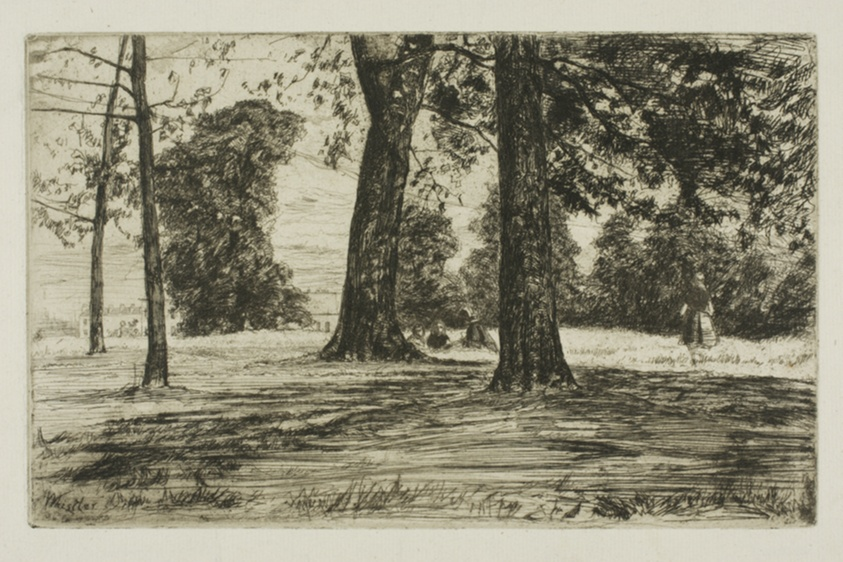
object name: Print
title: Greenwich Park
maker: James McNeill Whistler (American, 1834-1903)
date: 1859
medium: Etching and drypoint with foul biting in black ink on ivory laid paper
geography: United States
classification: etching; foul biting; print; prints and drawing; paper; drypoint